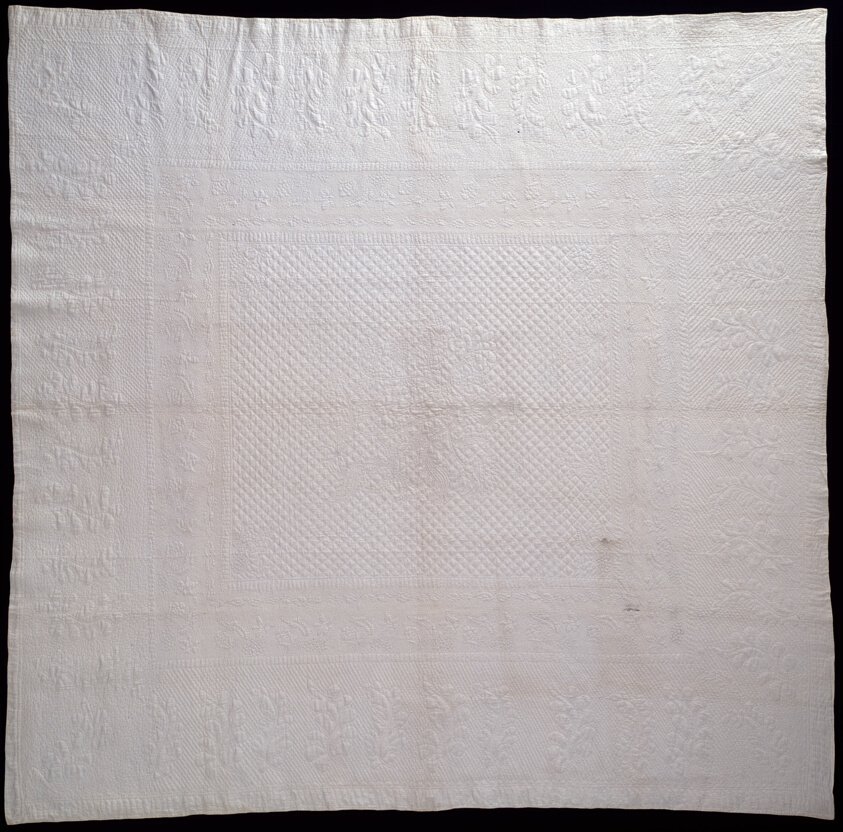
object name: Textile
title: Bedcover (Marseilles Quilt)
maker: United States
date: 1822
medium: Cotton, plain weave, quilted in running stitch; backed with cotton, plain weave; cotton batting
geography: United States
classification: textile; needlework - quilt